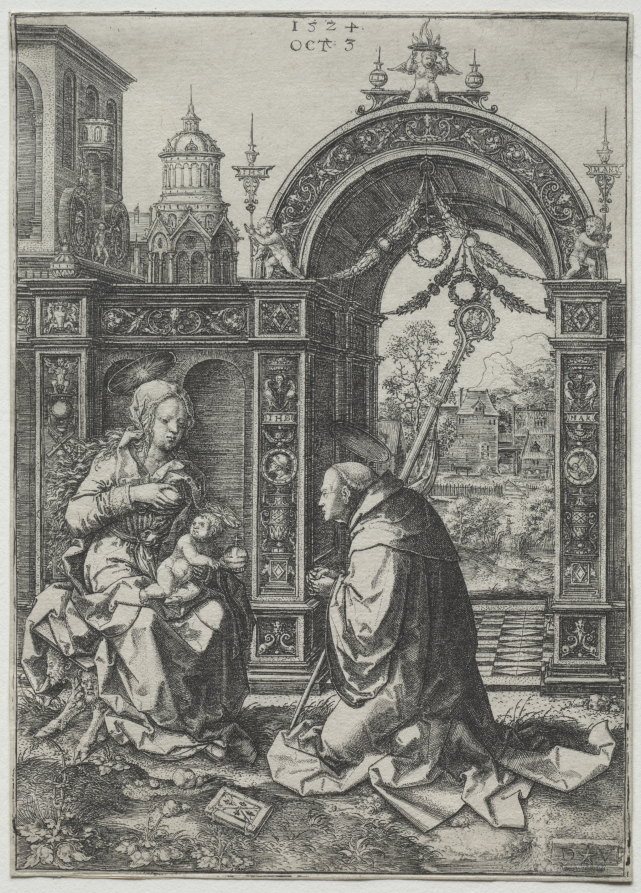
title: The Vision of St. Bernard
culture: Netherlands, 16th century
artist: Dirk Vellert (Netherlandish, 1480/85–1547)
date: 1524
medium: engraving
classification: Print